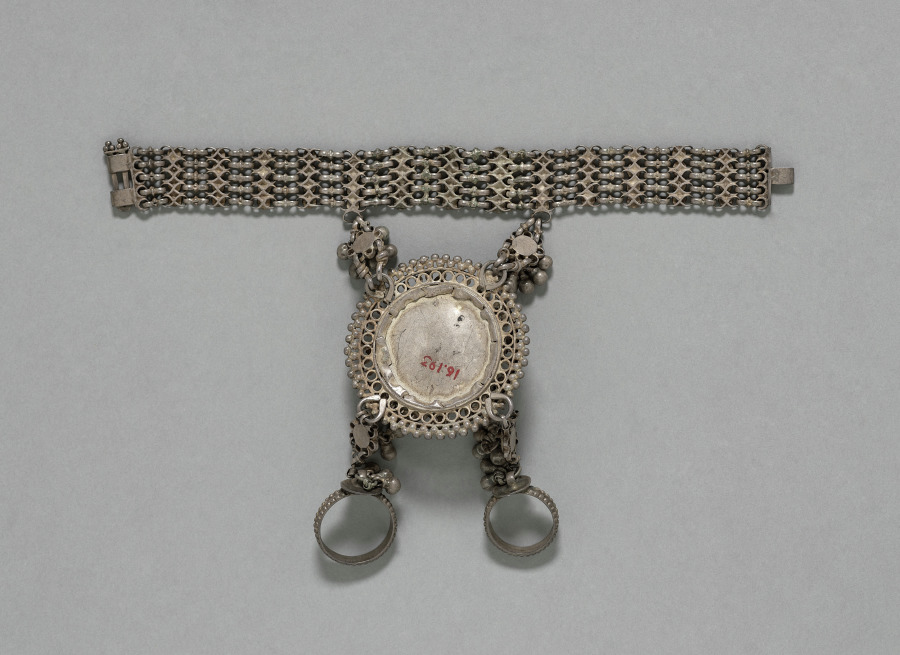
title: Rings and Bracelet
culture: India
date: 1800s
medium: silver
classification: Jewelry